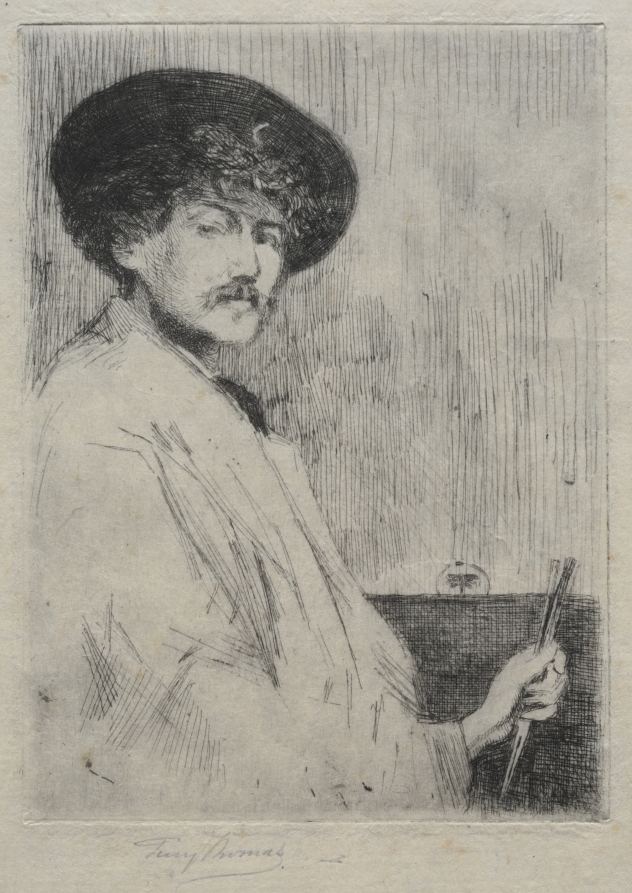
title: James MacNeill Whistler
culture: England, late 19th-early 20th century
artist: Percy Thomas (British, 1846–1922)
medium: etching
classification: Print